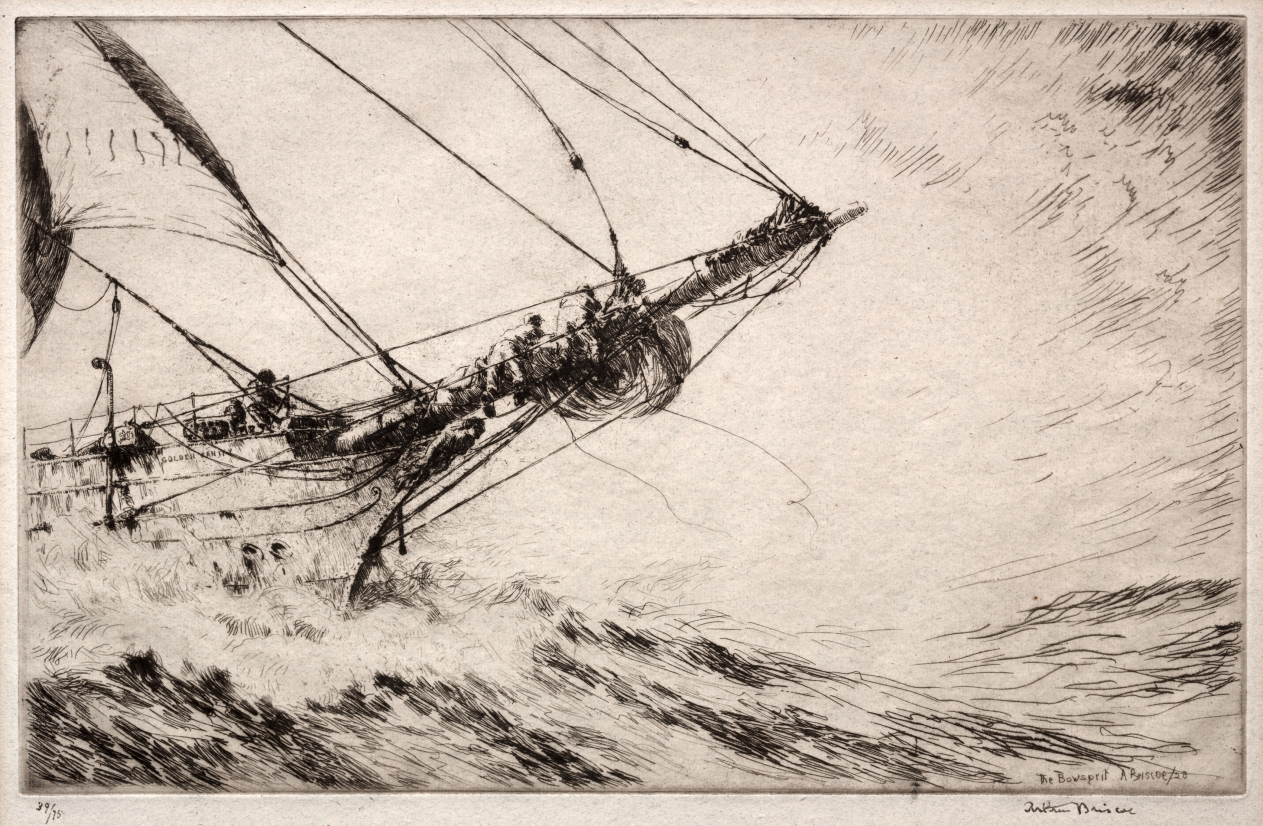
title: The Bowsprit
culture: England, 20th century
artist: Arthur John Trevor Briscoe (British, 1873–1943)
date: 1928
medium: etching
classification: Print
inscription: Lower margin, in ink: 39/75 Arthur Briscoe